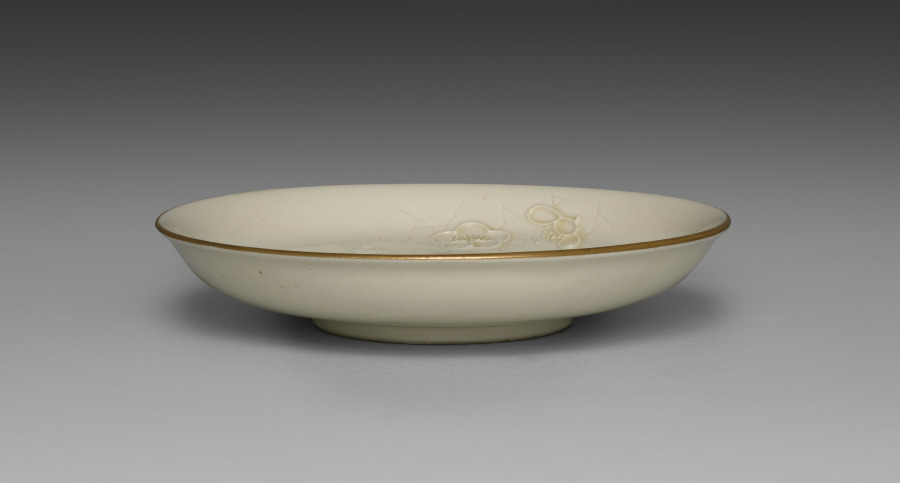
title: Medium-sized Dish from Dining Set with Plum Blossoms and Cracked-Ice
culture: Japan, Meiji period (1868–1912)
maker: Seifū Yohei II (Japanese, 1844–1878)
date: c. 1875–78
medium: Porcelain with molded designs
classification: Ceramic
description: Each item in this set has a delicate low-relief design of flowering plum branches over scattered, intersecting lines meant to resemble the cracked-ice surface of a frozen body of water and is signed on the base in gold pigment. While Yohei II produced many fine works in underglaze blue, like those produced by Kiyomizu Shichibei, he also made works in quite different styles later in his career, from the early 1870 s. In 1873, he was appointed purveyor to the Industrial Center of Kyoto Prefecture, a designation associated with Kyoto’s efforts to reach an international market through the port of Kobe; and from 1875 until his death, he was involved in national-level projects to present Japanese ceramics across the world. It was during this period that Yohei III was apprenticed to Yohei II, and it has been suggested that this set may in fact be an early example of Yohei III’s work, which he signed with his teacher’s name. Decorated with flowers resembling Japanese textile motifs, the set calls to mind the design of Yohei II’s pair of vases with plum blossoms in the Victoria and Albert Museum. Here, the elaborate trees created for a formal public exhibition setting have been translated into the approachable blossoms of the genteel domestic environment. While the designs are consistent across the pieces, each raised flower petal and pistil and each incised line in the ice was done by hand, so the cups, bowls, and dishes are similar yet unique. The bottoms of two boxes once identified the set’s owner, but the information has been deliberately obscured with black ink. However, inscriptions still visible appear to indicate two occasions, once at the end of July 1886 , and once again in June 1916 , when parts of the set were requested from Hokura in Niigata Prefecture. The location corresponds to a neighborhood in the present-day city of Jōetsu. The surname Tsuji 辻 also appears on a paper tag affixed to one of the box cloths. Future research may possibly reveal more about their provenance. A vase by Yohei III in a private collection combines the formal grandeur of the Yohei II vases in the Victoria and Albert Museum with the gentler design of this dining set, placing flowering plum trees against soft, scalloped-edge clouds resembling those in golden screens.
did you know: The dining wares have a creamy white coloration that the four boxes containing them identify as Korean in style.